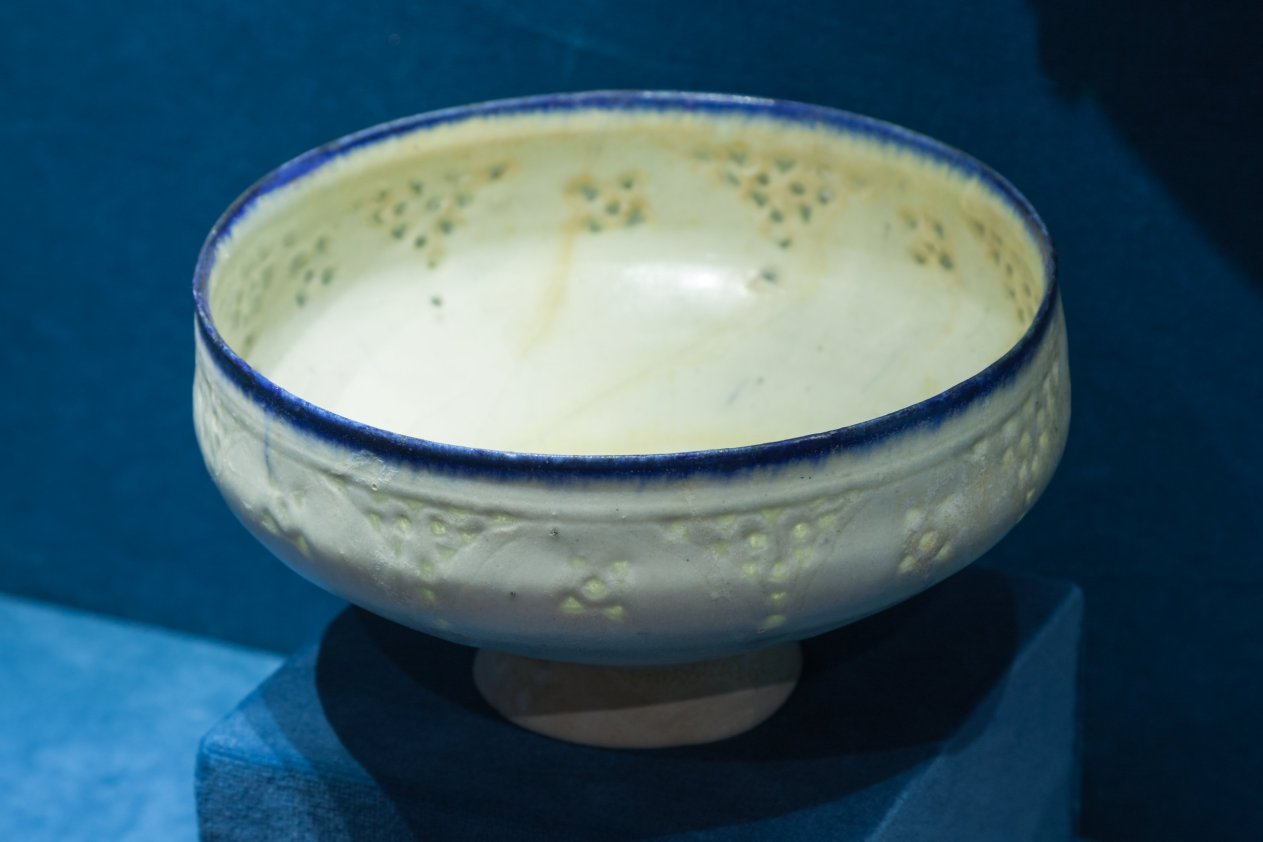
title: Footed Bowl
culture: Iran, probably Kashan, Seljuq period, late 12-early 13th century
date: late 1100s–early 1200s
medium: fritware, pierced and underglaze painting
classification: Ceramic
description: Iranian potters created transparency by piercing and glazing frit-body walls. Here, triangles and rosettes decorate incised scallops beneath the blue rim. The footed shape is derived from Iranian metal bowls.